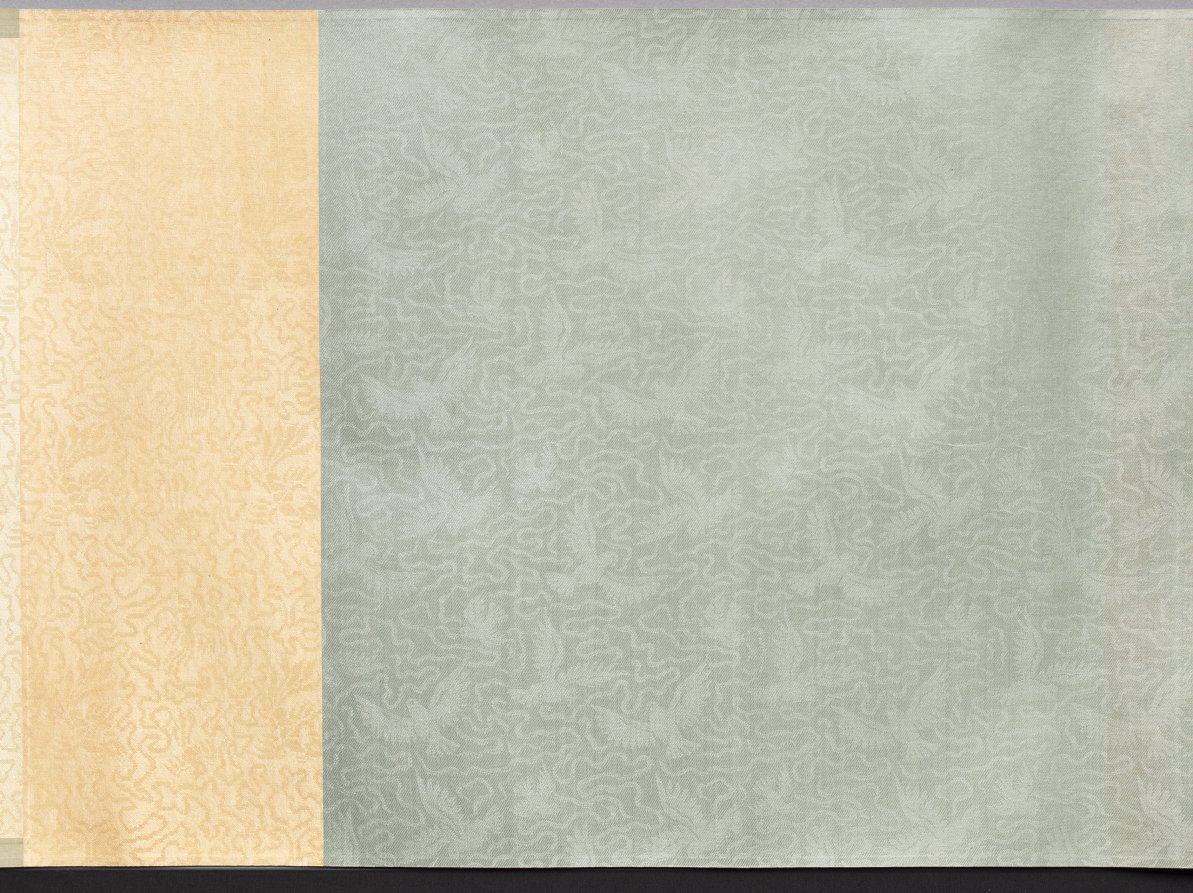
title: A Hundred Sparrows in a Lofty Grove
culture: China, Ming dynasty (1368–1644)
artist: attributed to Lin Liang (Chinese, 1416–1480)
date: 1368–1644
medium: handscroll; ink on silk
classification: Painting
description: Sparrows engaged in all kinds of activities frolic amid leafy branches, blades of grass, rocks, and a waterfall. As our eyes move over the scroll, the artist engages us in enjoying the sparrows’ carefree movements in a natural setting. The charming birds were painted from close observation in swift and fluent brushstrokes. Sparrows are a common bird and in Chinese painting they often represent the commoner in human society as opposed to the noble pheasant or peacock representative of the ruling class.